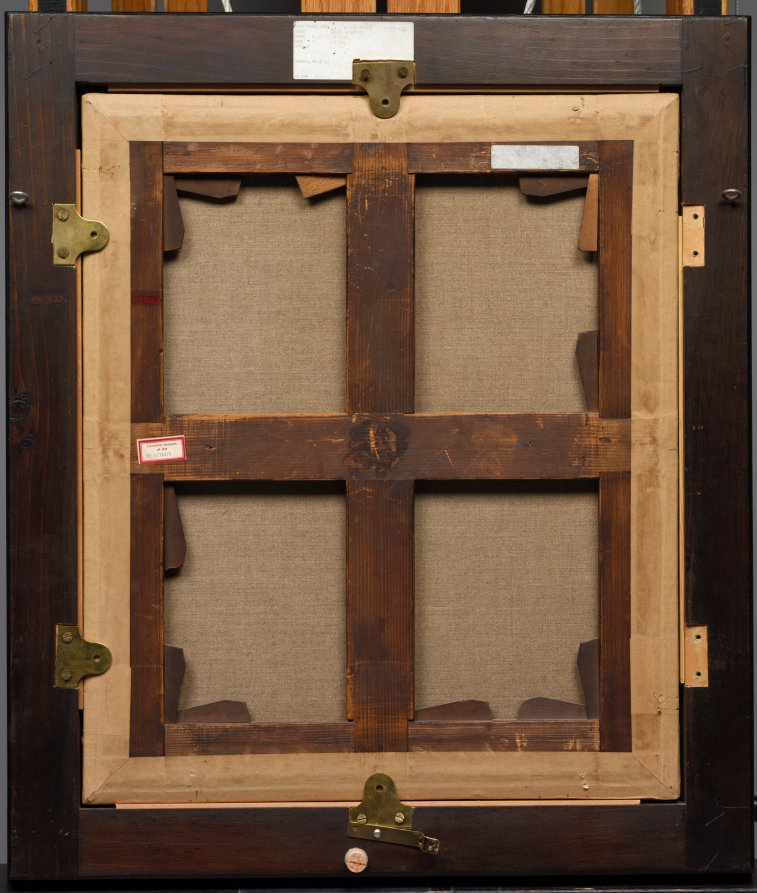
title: A Musical Company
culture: Netherlands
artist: Jacob Ochtervelt (Dutch, 1634–1682)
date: c. 1668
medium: oil on canvas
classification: Painting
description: Despite the calm demeanor and elegant disposition of the figures, this interior scene probably represents the interior of a brothel, signaled by the row of female portraits in the background, rarely found in other paintings of this period. The depiction of music provides another clue to the subject. The recorder and violin, played without scores, were perceived as cruder instrumentation and associated with prostitution, versus the elegant and complicated musicmaking seen in the work by Pieter de Hooch in the museum's collection.